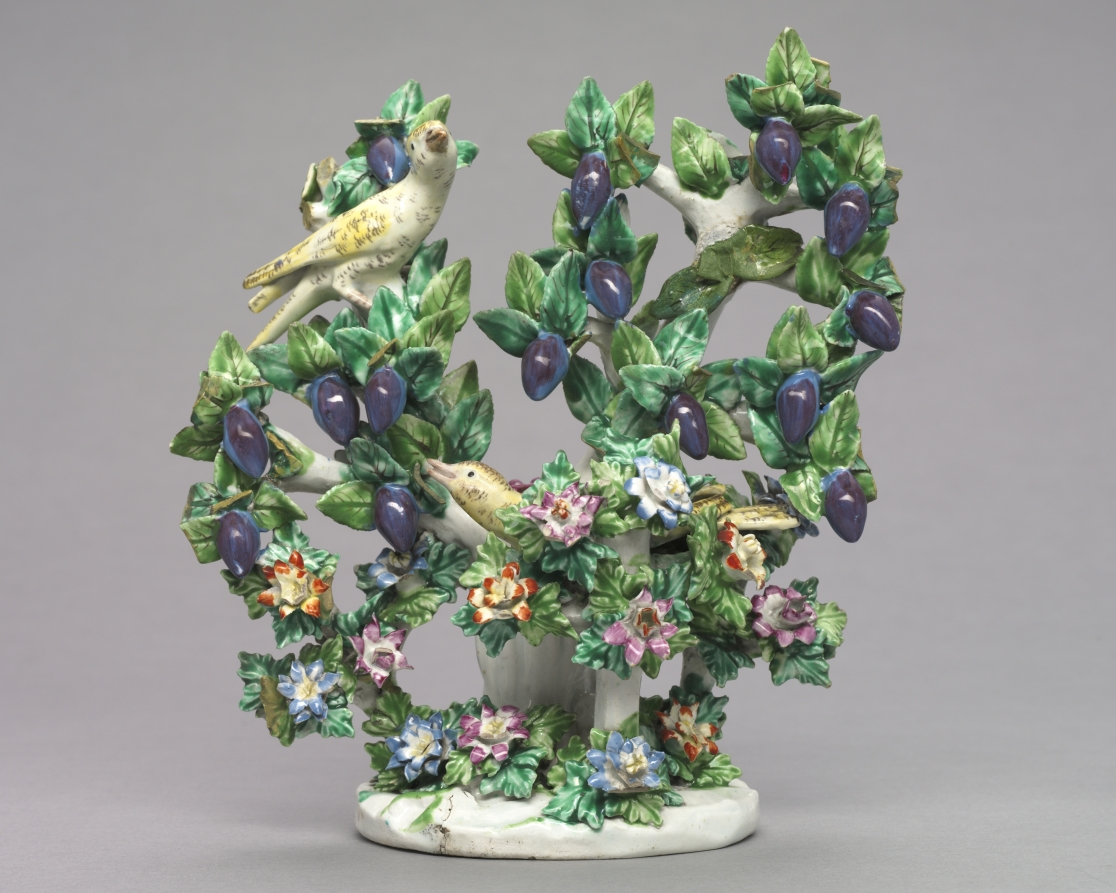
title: Birds and Plum Tree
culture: England, Bow, 18th century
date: 1760–1765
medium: porcelain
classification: Ceramic